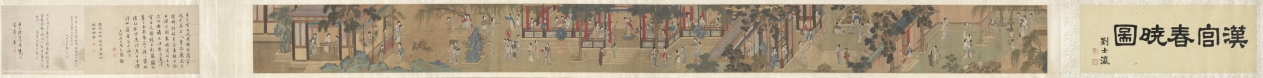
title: Palace Ladies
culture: China, Qing dynasty (1644-1911)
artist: copy after Qiu Ying (Chinese, 1494–1552)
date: 1644–1911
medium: handscroll, ink and color on silk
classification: Painting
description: This handscroll illustrates the pursuits of court ladies in a palace precinct on a spring day. Women, young girls, and their maids amuse themselves by sitting on a swing, playing games, watering and admiring peonies, performing music together, playing the qin (zither), feeding a parrot on the balustrade and fish in the water, or catching butterflies. The life of elite women was mostly restricted to the so-called inner quarters, meaning the garden and inner courts of the house. This painting idealizes the world of young palace girls that in fact was often filled with boredom and waiting for a lover.